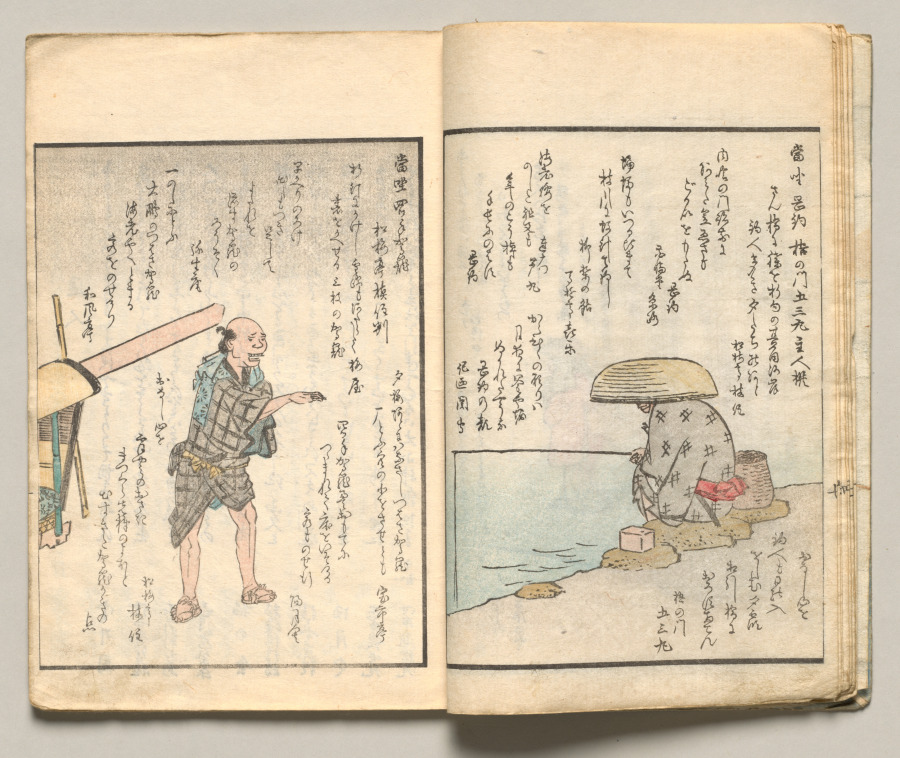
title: Spread Eight from Volume Six of People of Japan in Light Verse (Kyōka)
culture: Japan, Edo period (1615–1868)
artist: Utagawa Hiroshige (Japanese, 1797–1858)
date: 1857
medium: Woodblock-printed book; ink and color on paper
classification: Bound Volume